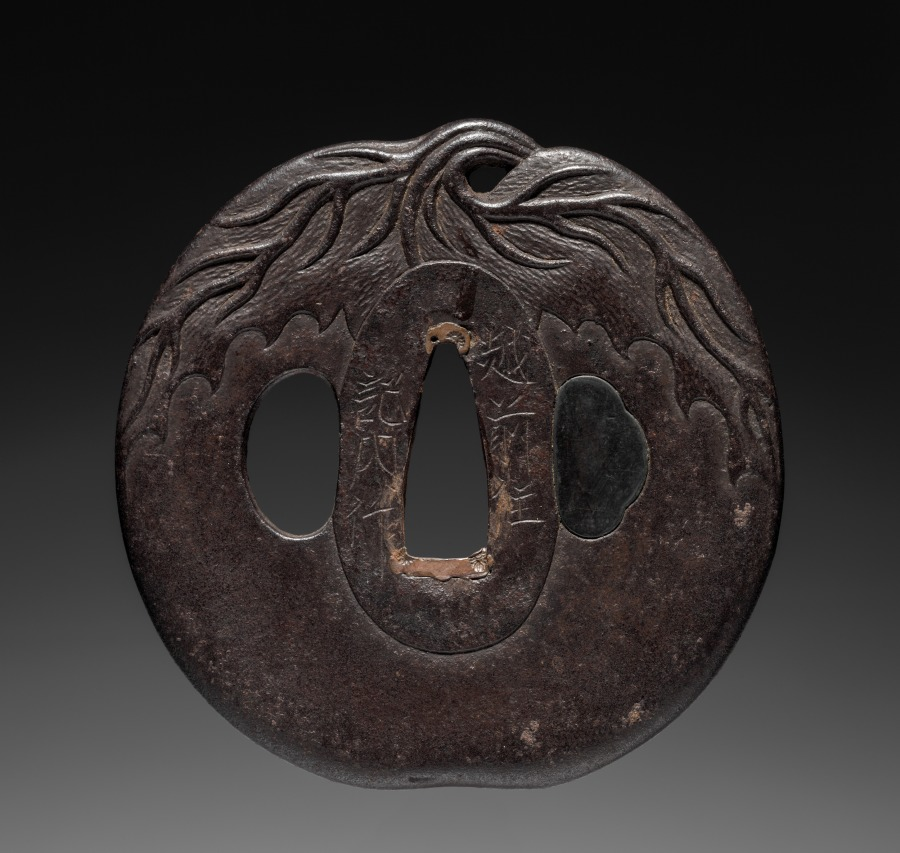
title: Sword Guard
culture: Japan, Edo period (1615–1868)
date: early 1800s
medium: iron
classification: Arms and Armor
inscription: Signature: Kinai, residing in Echizen (province), made